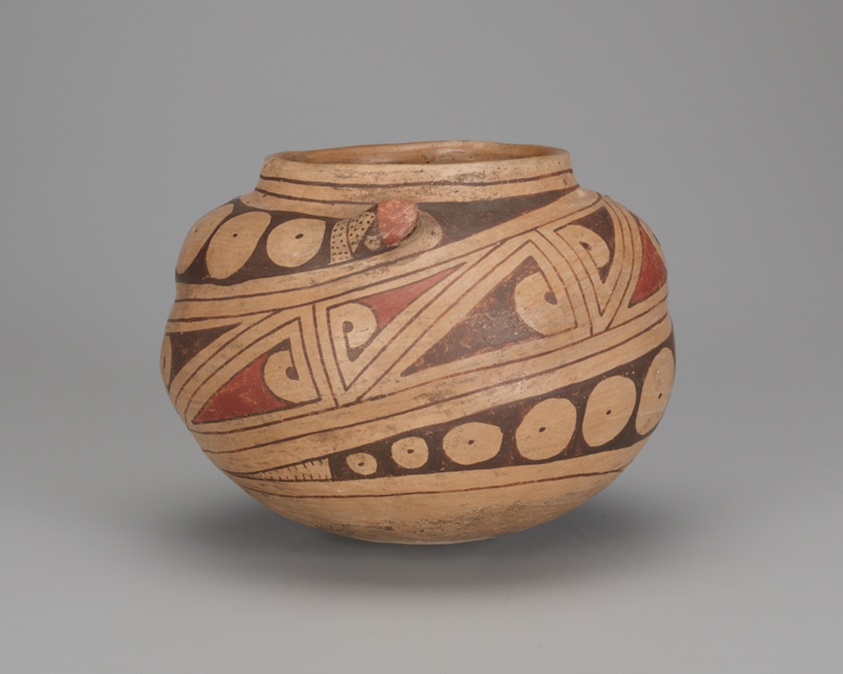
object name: Vessel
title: Storage Vessel with Snake Relief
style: casas grandes, americas, Arts of the Americas, native american, native north american, southwest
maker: Ceramist unknown (Casas Grandes); New Mexico, United States, or Chihuahua, Mexico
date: 1280–1450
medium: Ceramic and pigment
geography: New Mexico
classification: vessel; art of the americas; ceramics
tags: animals, owls, snakes, snake